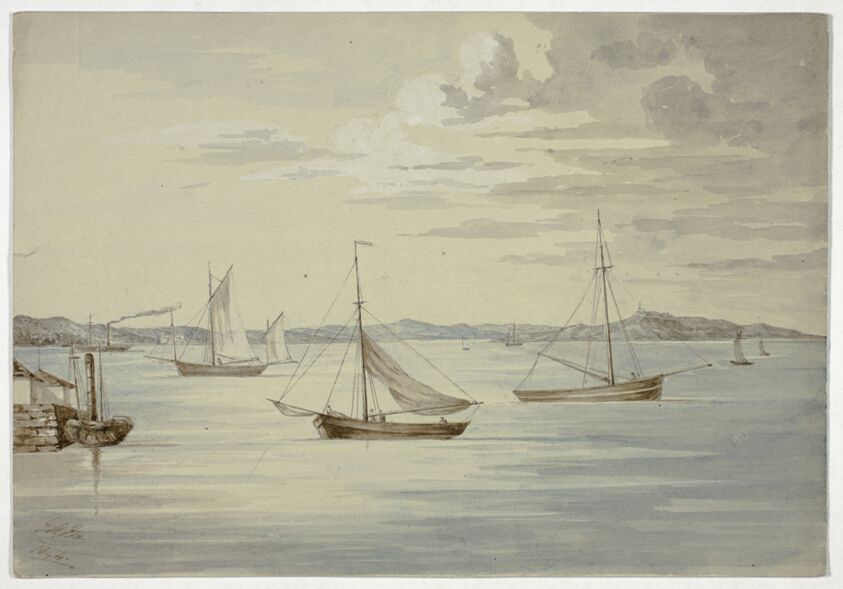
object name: Drawing and Watercolor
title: View Inchkeith and the Firth of Forth Islands from Granton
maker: Elizabeth Murray (English, c. 1815-1882)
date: September 1844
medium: Watercolor and white gouache over traces of graphite on gray wove paper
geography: England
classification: watercolor; drawings (visual works); prints and drawing